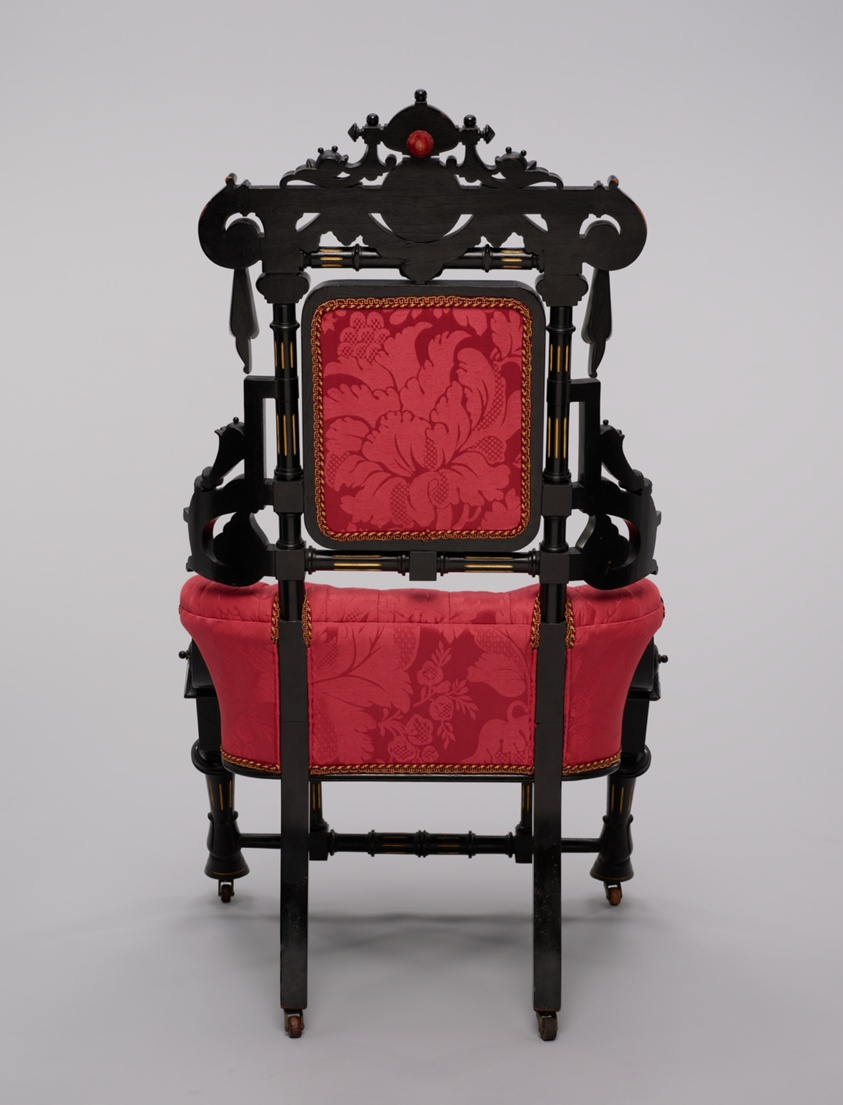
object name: Furniture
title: Armchair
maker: George Jakob Hunzinger (American, born Germany, 1835–1898)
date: About 1869; patented in 1869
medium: Ebonized walnut with gilt decoration and upholstery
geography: New York City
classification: seating; furniture; american decorative arts; american arts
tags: furniture